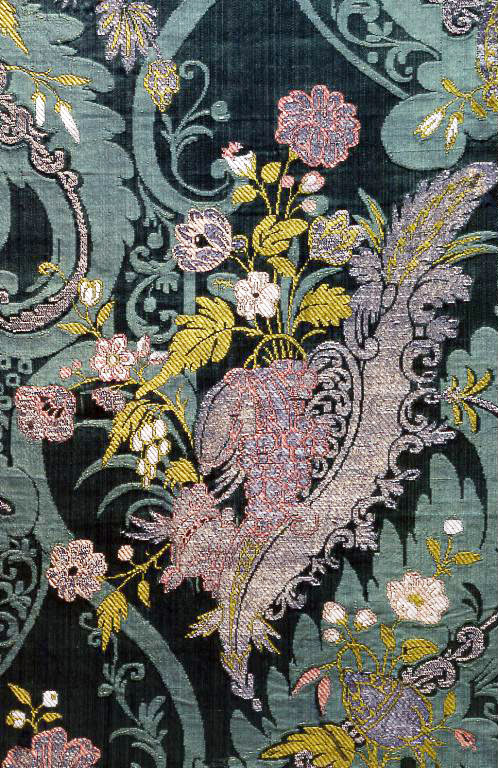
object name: Textile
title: Three Panels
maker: France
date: 1712/13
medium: Silk, gilt-and-silvered-metal-strip-wrapped silk, 4:1 satin weave with supplementary brocading wefts and self-patterned by reversing of faces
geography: France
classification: textile; weaving